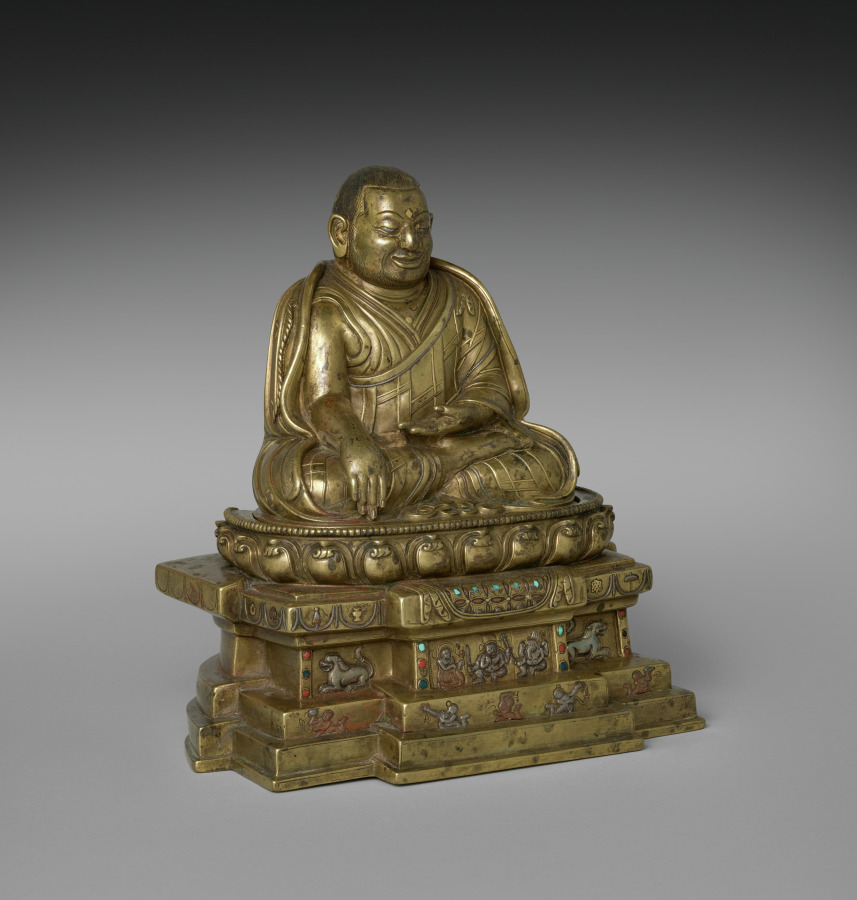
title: Portrait of Phagmo Drupa Dorje Gyalpo (1110–1170)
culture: Central Tibet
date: 1200s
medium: gilt bronze with gold, silver, copper, turquoise, lapis, and coral inlay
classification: Sculpture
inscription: / / Na mo 'ghu ru / / Ngan lam ban chung bdag gis ni / / bla ma Rin chen sku bzhengs pa yi / / bsod nams 'di yi byin brlabs kyis / / 'gro drug sdug sngal zad par shog / / Translation: "Salutations to the master ! May the sufferings of the six kinds of beings be appeased through the blessing of merit gained by me, the little monk of Ngan.lam, in having this statue of the Lama Rin.chen made."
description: This portrait statue depicts the first monastic leader of the prominent Buddhist monastery of Densatil, an influential early leader of the Tibetan Buddhist monastic order called Kagyu, famous for his views on the importance of meditation. He sits on a lotus pedestal and lion throne, like a Buddha, and his hand positions (mudras) communicate that meditation leads to enlightenment.